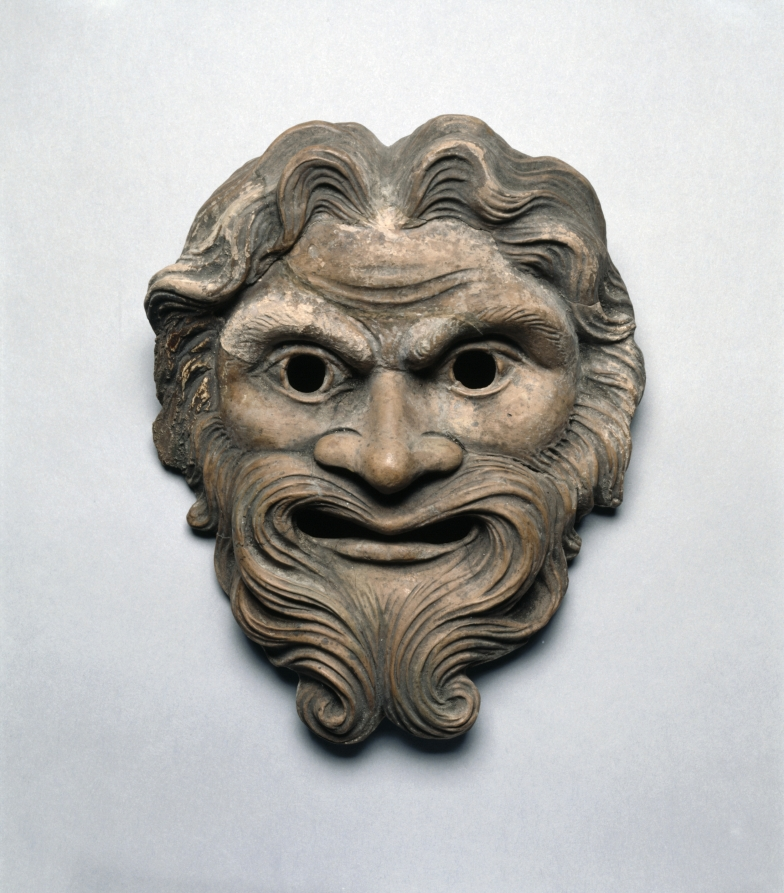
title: Mask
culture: Italy, Roman (?)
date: 1–100 CE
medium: terracotta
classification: Sculpture